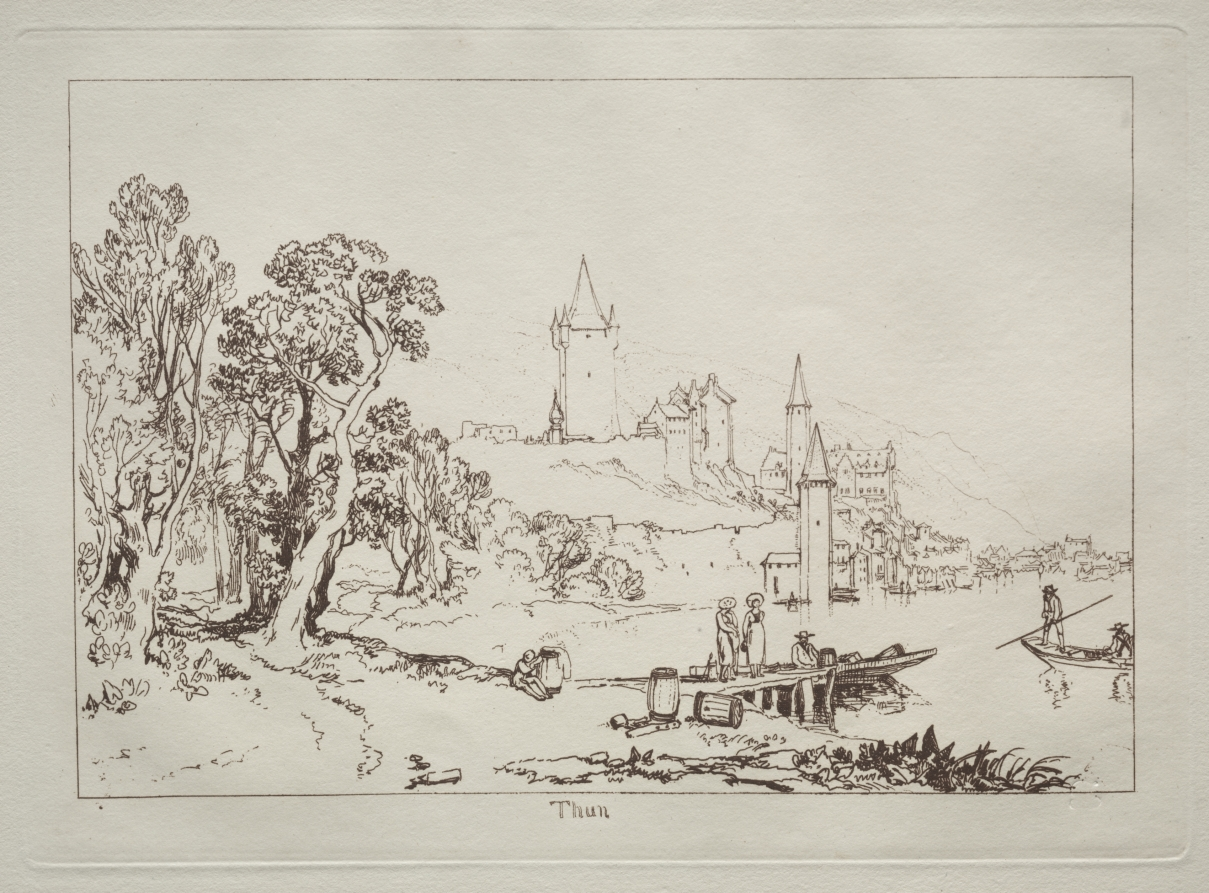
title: Liber Studiorum: Ville de Thun, Switzerland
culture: England, 19th century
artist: Joseph Mallord William Turner (British, 1775–1851)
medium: etching and mezzotint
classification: Print